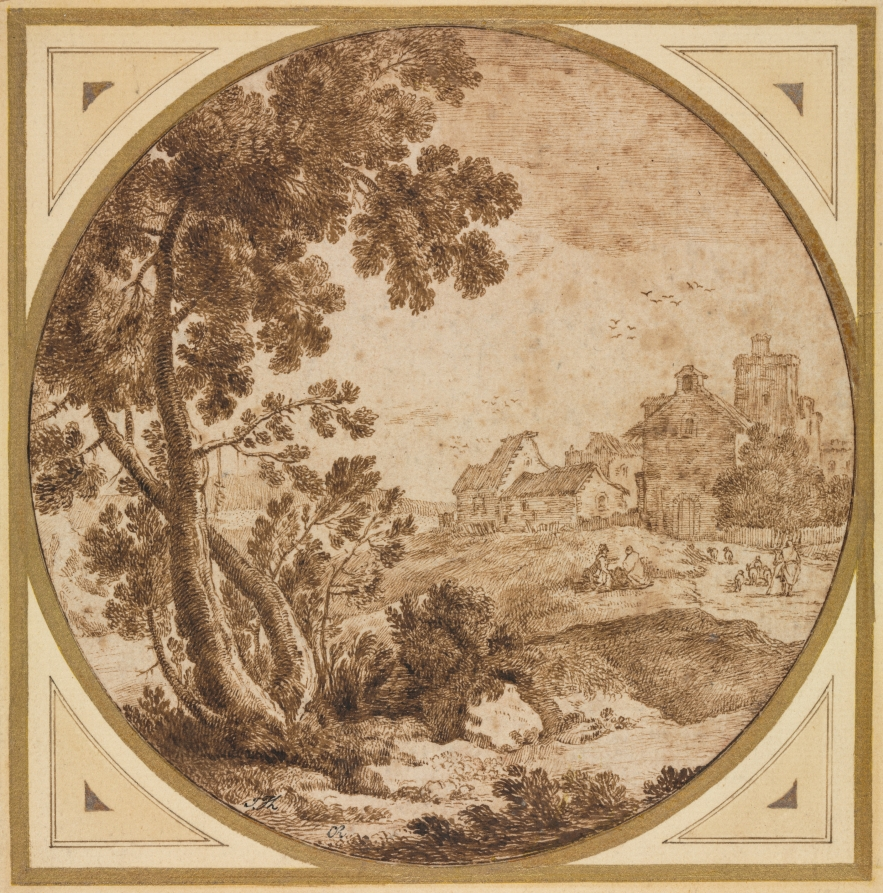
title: Landscape with Buildings and Figures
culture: Italy, 17th century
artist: Onorio Marinari (Italian, 1627–1715)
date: second half 1600s(?)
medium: pen and brown ink; framing lines in brown ink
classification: Drawing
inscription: RECTO OF SECONDARY SUPPORT, in top half, in graphite: CR Collection Charles Rogers 1711 -1784 / J. Th '' John Thane 1747 - 1818 ; center, in black ink: acheté à Londres / Onorio Marinari ; lower right, in black ink: vv/ lower center, in graphite: Onorio Marinari